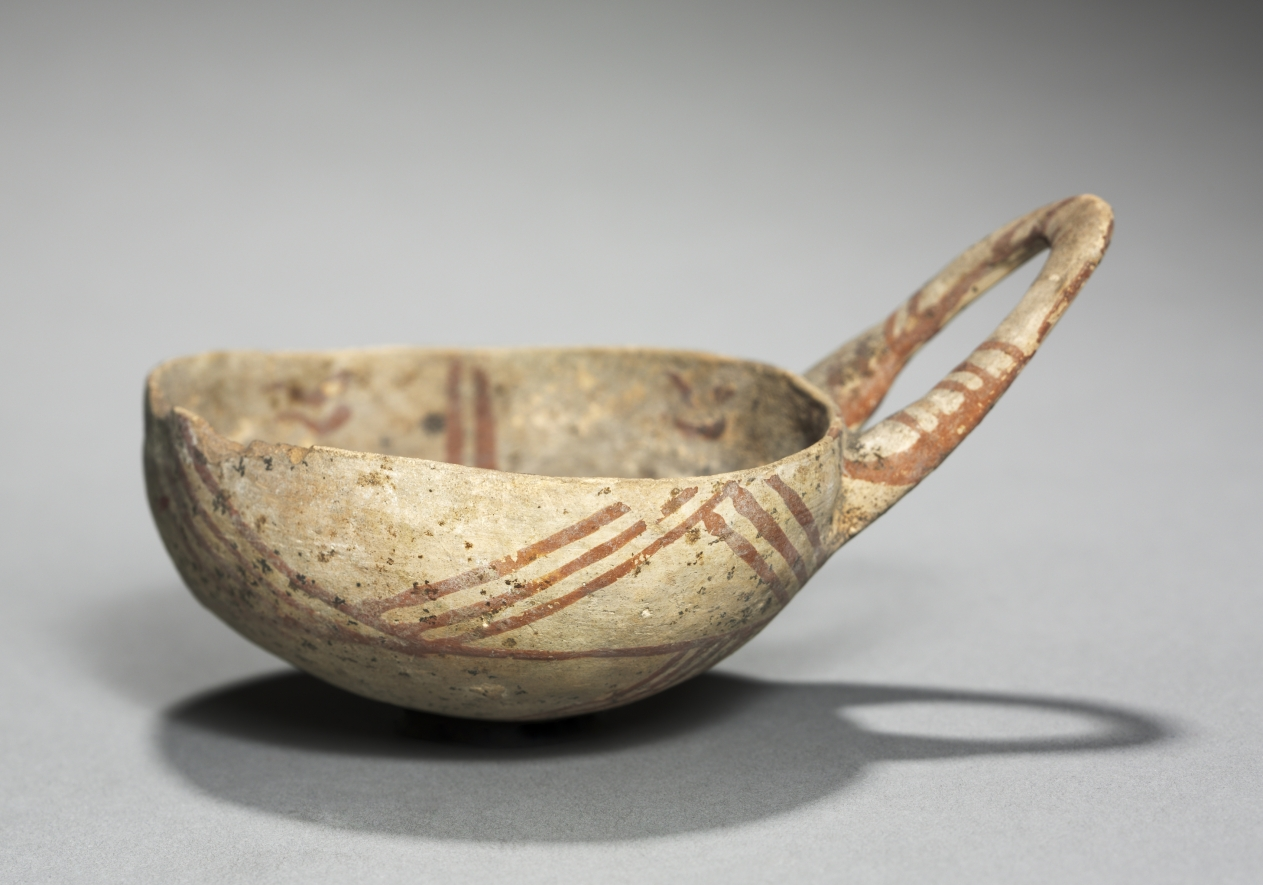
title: One-Handled Bowl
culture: Cyprus, middle Cypriot III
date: c. 1725–1600 BCE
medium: white painted ware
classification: Ceramic